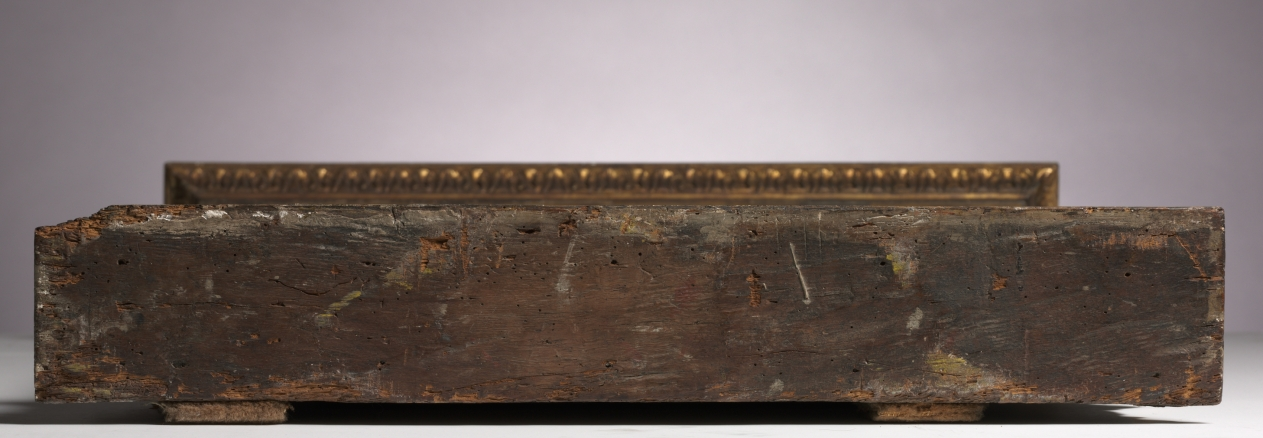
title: Virgin and Child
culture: Italy, Venice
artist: workshop of Pietro Lombardo (Italian, c. 1435–1515)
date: c. 1475–1485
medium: marble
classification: Sculpture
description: In the later 1400s, artists increasingly infused sacred subject matter with a classical vocabulary. The shallow relief and simplified forms ultimately stemmed from ancient sculpture, bringing gravity as well as novelty to a conventional theme. Yet naturalistic elements such as the baby’s bulging navel, chubby wrists, and shirt pulled up to reveal his genitals all humanize Christ, a critical principle of Christian dogma.